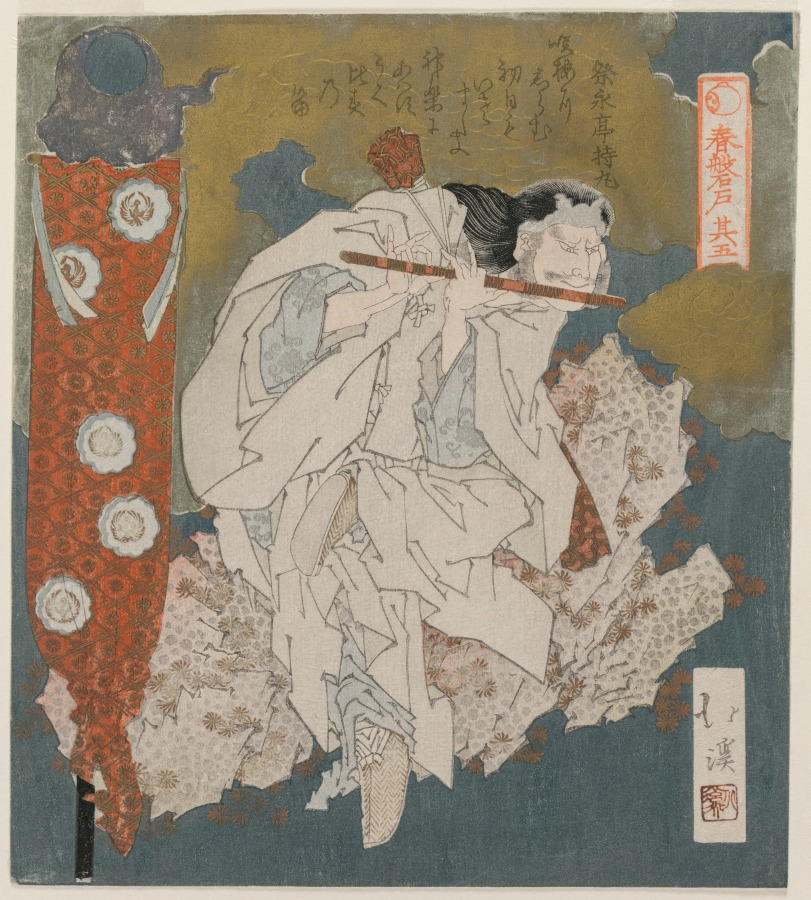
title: Flautist from The Cave Door of Spring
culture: Japan, Edo period (1615–1868)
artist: Totoya Hokkei (Japanese, 1780–1850)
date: 1825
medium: fifth from a pentaptych of woodblock prints; ink and color on paper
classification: Print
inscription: Signature: Hokkei Seal: Hokkei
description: These elegant surimono prints come from a set of five images inspired by the legend of the Shinto Supreme Sun Goddess, Amaterasu. She was once so offended by her brother that she retreated into a cave, leaving the earth in darkness. Several attempts to lure her out with cocks crowing, music-making, and a goddess dancing failed, but a mirror hung from a nearby tree made Amaterasu curious, bringing her to the entrance of the cave. A stone was quickly placed at the entrance to block her way back into the cave, and light was restored to the world. Each print is set against a blue evening sky with embossed clouds enriched with gold, silver, and copper.